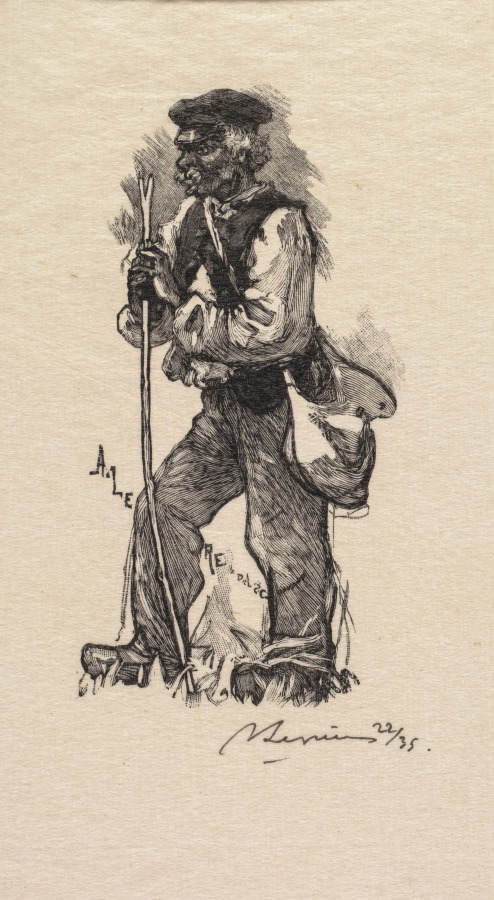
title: Fontainebleau Forest: Serpent Merchant (La Forêt de Fontainebleau: Le chasseur de serpents)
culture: France, 19th century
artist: Auguste Louis Lepère (French, 1849–1918)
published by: A. Desmoulins, Published in Revue Illustrée, 1887–90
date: 1890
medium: wood engraving from bound volume of 34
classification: Bound Volume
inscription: In block, lower left: A. LEPÈRE. Del. sc; below image, lower right, in black ink: ALepère 22/35; on window mat, lower right, in graphite: Le chasseur de Serpents